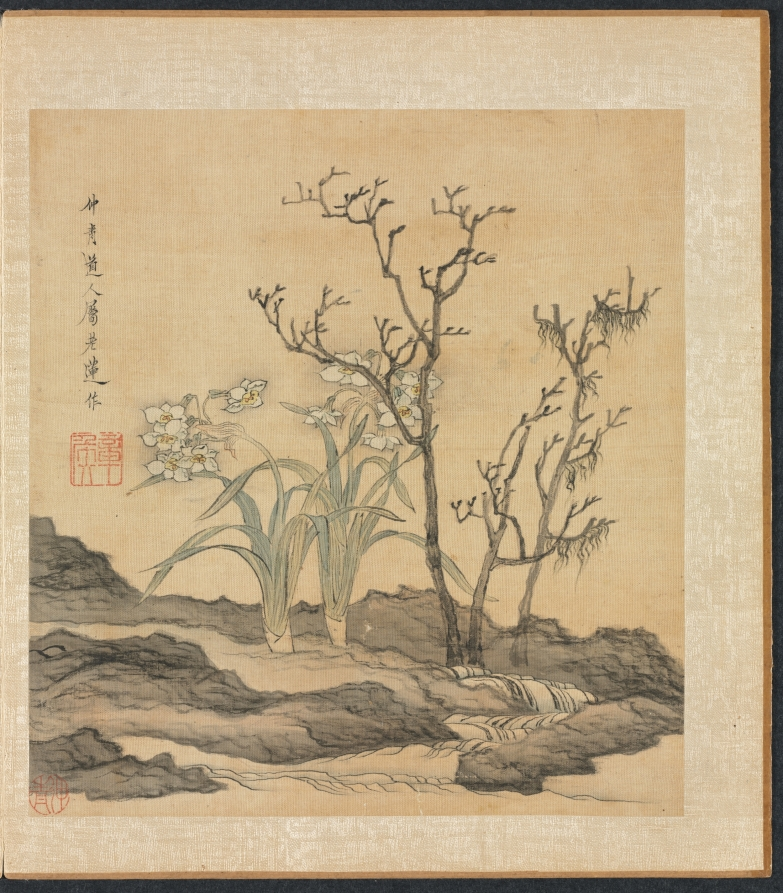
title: Paintings after Ancient Masters: Narcissus and Bare Trees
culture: China, Ming dynasty (1368–1644)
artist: Chen Hongshou (Chinese, 1598/99–1652)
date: 1598–1652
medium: album leaf; ink and color on silk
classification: Painting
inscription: The Daoist Zhongqing entrusted Laolian to paint [this]. [Seal] Zhanghou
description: The twenty paintings in this double album by Chen Hongshou include landscapes, figures, and flowers. It also has one leaf featuring a woman, an often-used subject not found in the other albums from the latter part of his career. His late works are wonderful summations of Chen's peculiar and quirky art—archaistic, hyper-refined—but without accompanying shallowness or sentimentality. His figures and landscapes in the late albums are miniaturized, not unlike the small Chinese gardens, or the carefully selected small table rocks or old roots used for contemplation to see the world in miniature. This loss of scale is quite deliberate and reflects the psychological situation of a depressed class like the Ming loyalist officials and scholars, deprived of their integrity and honor, and forced to lead a diminished and restricted existence.